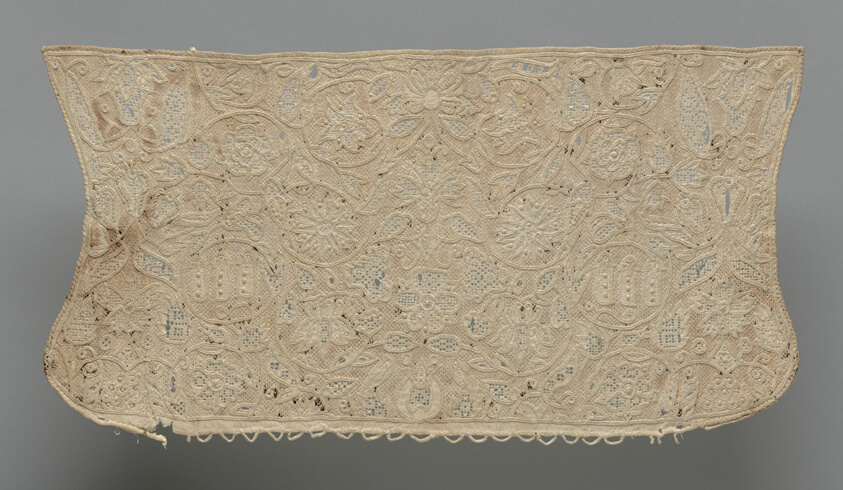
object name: Textile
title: Coif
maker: England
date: 1601/25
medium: Linen, plain weave; cut and drawn work in antique hem, double-rowed openwork, interlocking lace, overcast, and satin stitches; darned and overcast bars; darned and woven wheels; darned squares; woven picots; embroidered with silk and linen in bullion, satin and square chain stitches; buttonhole wheels and eyelet holes; edged with buttonhole loops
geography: England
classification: textile; costume accessory - headdress; needlework (visual works); costume accessory